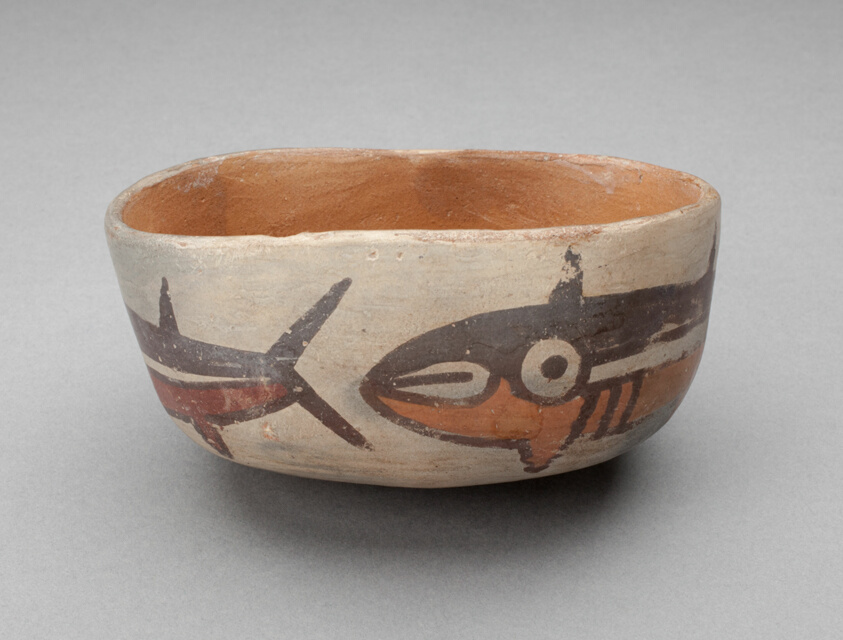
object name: Vessel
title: Bowl Depicting Row of Fish or Sharks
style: nazca, early intermediate period, Pre-Columbian, americas, Arts of the Americas, andean, andes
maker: Nazca; South coast, Peru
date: 180 BCE–500 CE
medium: Ceramic and pigment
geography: Nazca Valley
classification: bowl; earthenware; art of the americas; ceramics; vessel